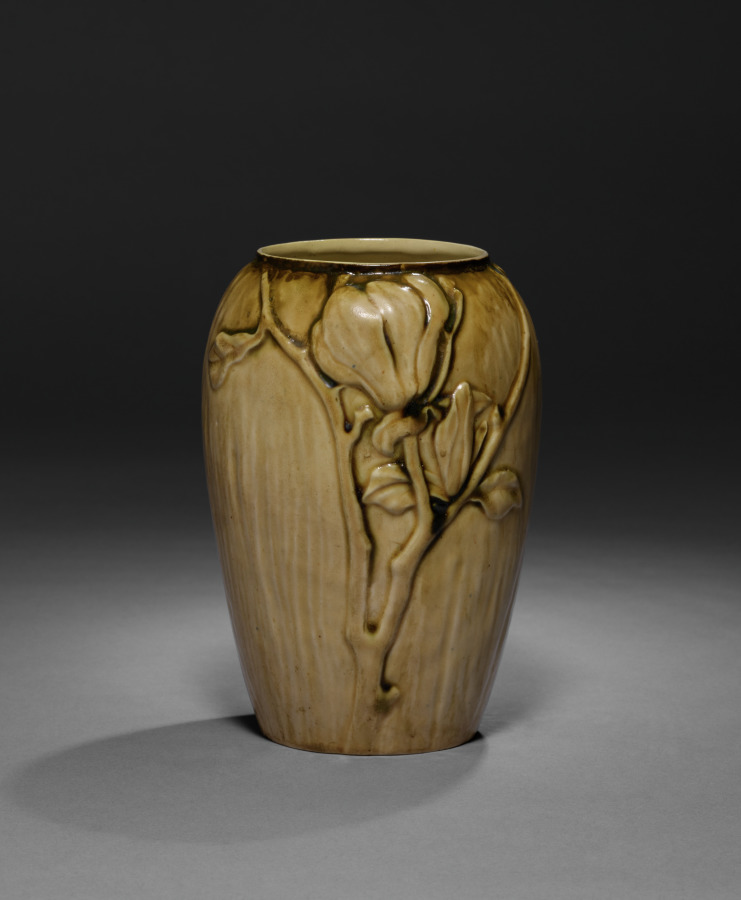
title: Ginger Jar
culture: America, New York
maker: Tiffany Studios (United States, New York, 1902–32)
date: c. 1904–14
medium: glazed white clay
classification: Ceramic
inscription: LCT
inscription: Tiffany Favrile Pottery P413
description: By 1900 Louis Comfort Tiffany had expanded his empire by increasing the firm’s production of “fancy goods,” including inkstands, candlesticks, clocks, small boxes, desk sets, tea screens, and other functional objects. Along with the array of artistic glass designs from his factory in Corona, Queens, works in ceramic, bronze, other metals, and even jewelry abounded. These smaller, more affordable luxury items were designed with as much thought to artistry as the great stained glass windows and lamps through which the firm enjoyed unrivaled success.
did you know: Ceramic works were Louis Comfort Tiffany's contribution to the art pottery movement of the early 1900s.